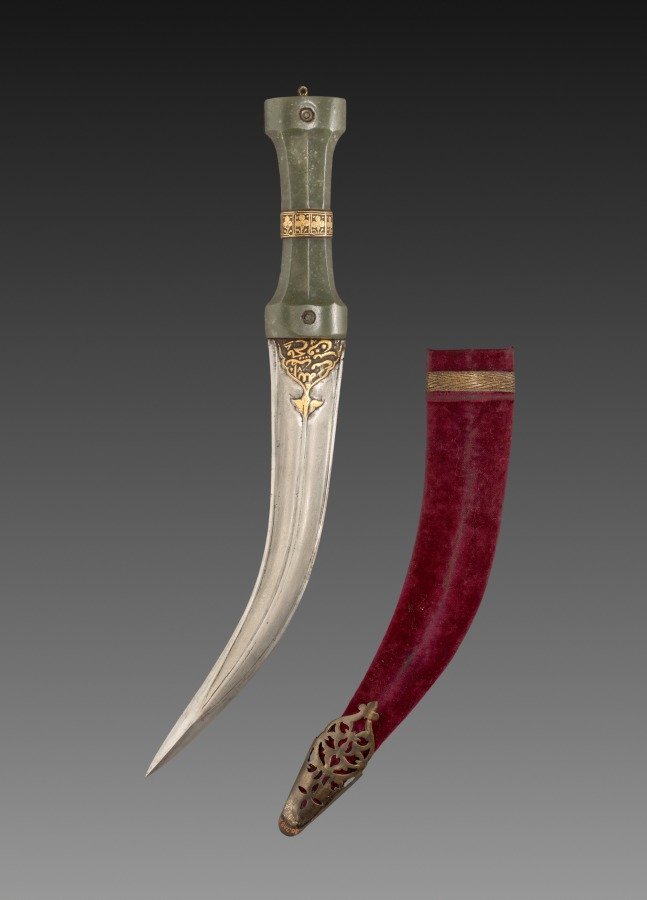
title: Khanjar dagger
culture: India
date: c. 1600s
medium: Jade hilt with iron and gold; steel blade with iron and gold; wood sheath covered in velvet with metallic thread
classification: Arms and Armor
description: Daggers with curved blades, known as khanjar, were worn tucked into the belt as one of the basic accessories for Mughal men. An all-purpose knife that could be used in hunting or fighting, the khanjar was also a visible status symbol. The use of jade and gold indicates that this dagger was owned by a member of the court. The gold inscriptions on the blade, just under the hilt, are quotations from the Qur’an, the most sacred book for Muslims. On one side is the opening line: “In the Name of God the Merciful and the Compassionate,” and on the other is a popular verse from chapter (sura) 61: “Help comes from God, and Victory is imminent.”